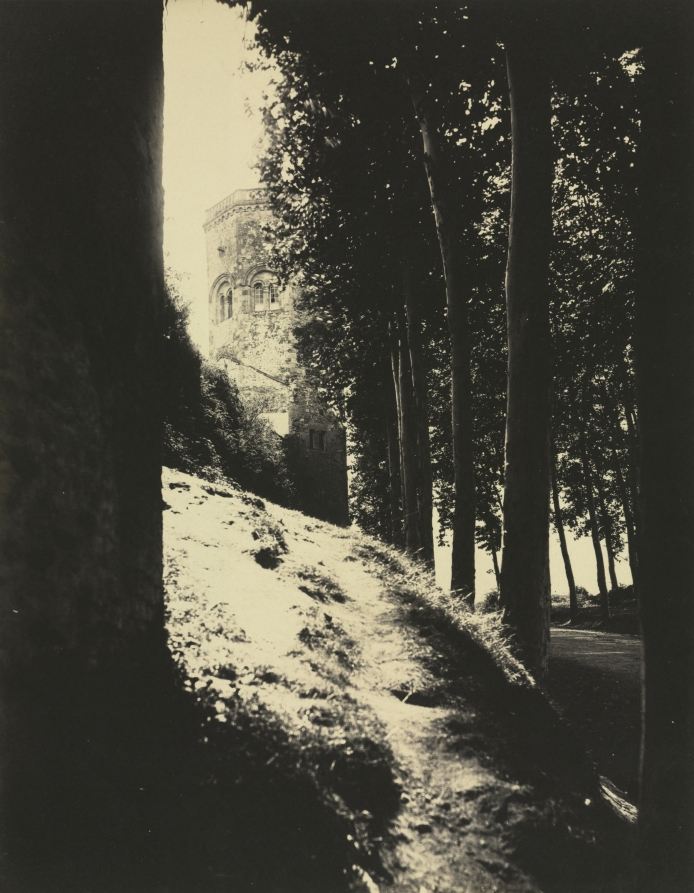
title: Autun, Tower of Ursulines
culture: France, 19th century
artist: Charles Lenormand (French, 1835–1904)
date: c. 1860s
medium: albumen print from wet collodion negative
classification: Photograph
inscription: Written in pencil on recto: "Saone et Loire Autun - Tour des Ursulines"; on verso: "3500- / net [erased]"